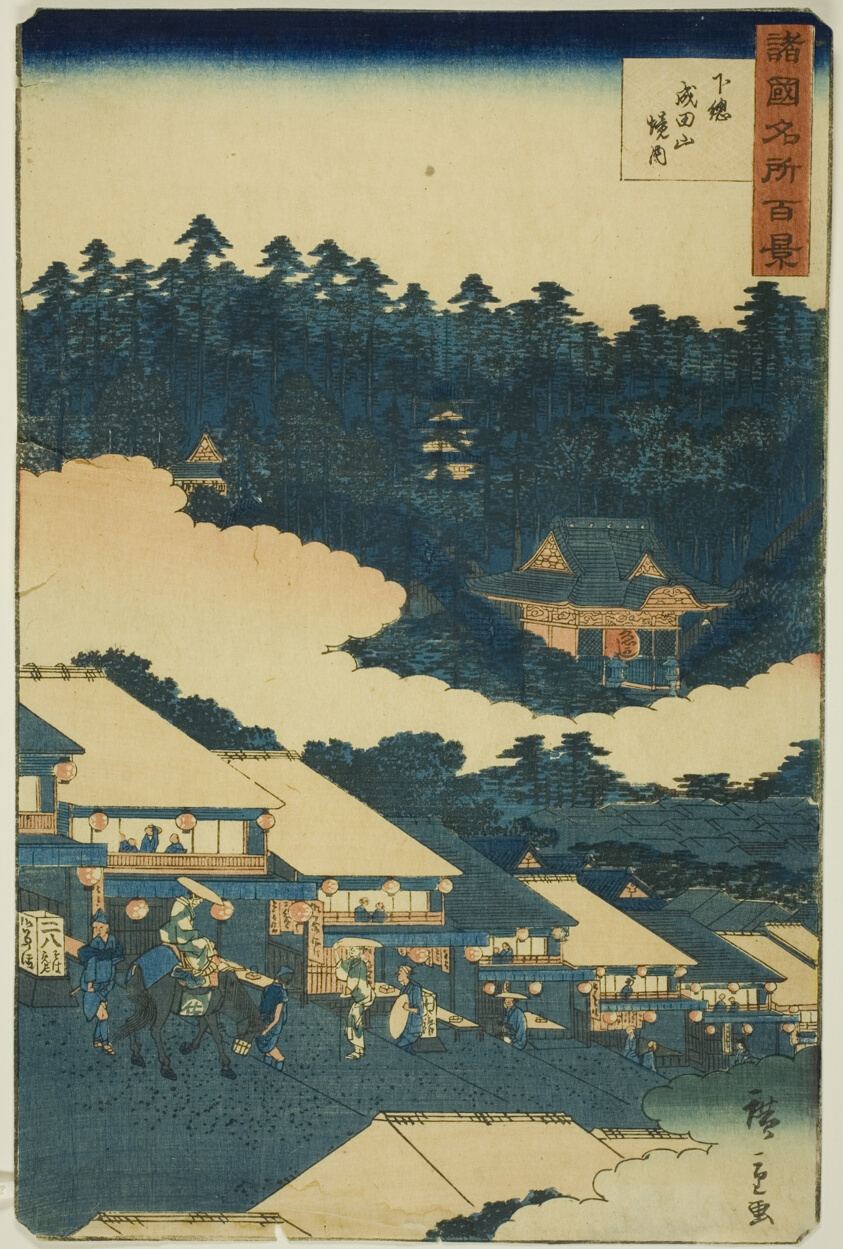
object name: Print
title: The Precincts of Naritasan Temple in Shimosa Province (Shimosa Naritasan keidai), from the series "One Hundred Famous Views in the Various Provinces (Shokoku meisho hyakkei)"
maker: Utagawa Hiroshige II (Shigenobu) (Japanese, 1826–1869)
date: 1859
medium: Color woodblock print; oban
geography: Japan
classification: print; asian art